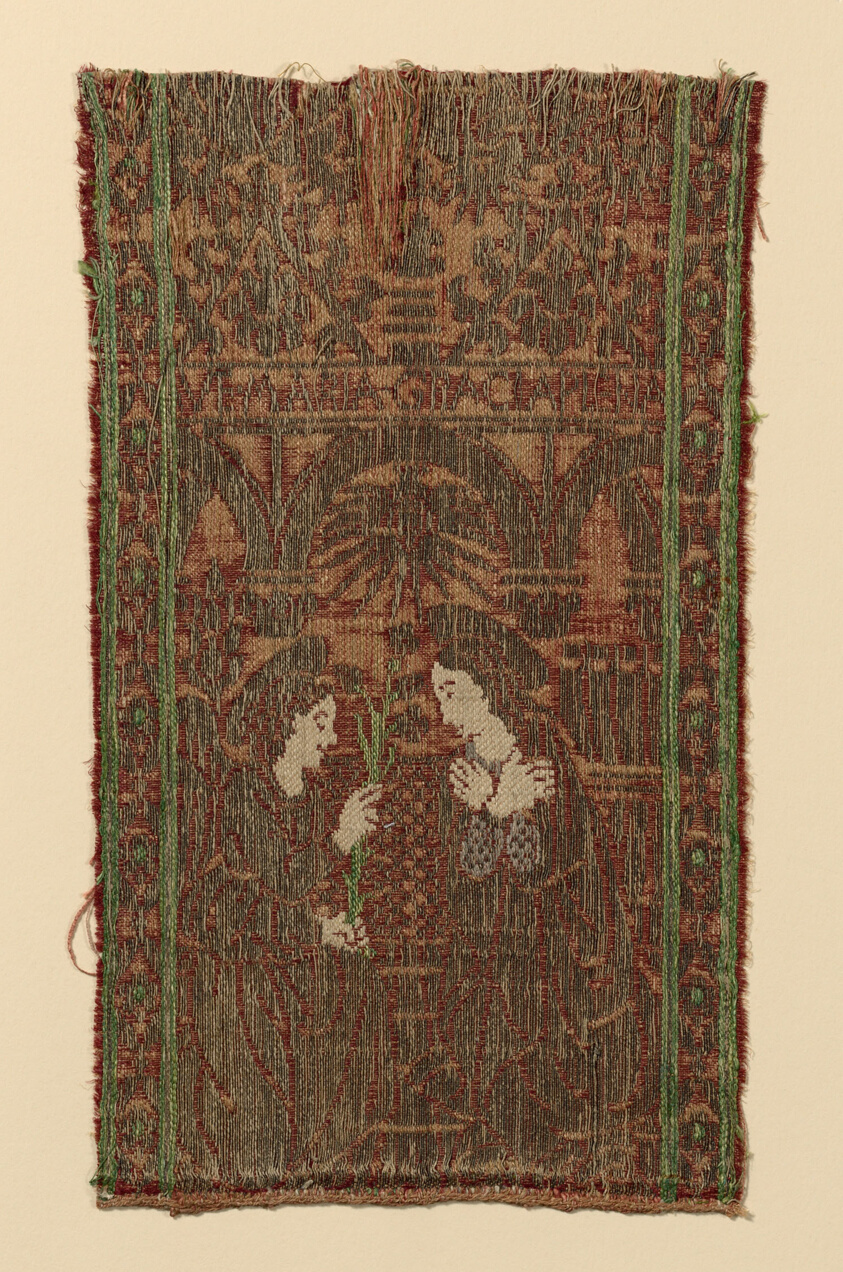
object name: Textile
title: Fragment from an Orphrey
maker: Italy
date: 15th century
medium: Silk, linen, and gold gilt strip intergrated compound weave of warp-floatfaced satin weave and weft-float faced twill weave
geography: Italy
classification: textile; weaving